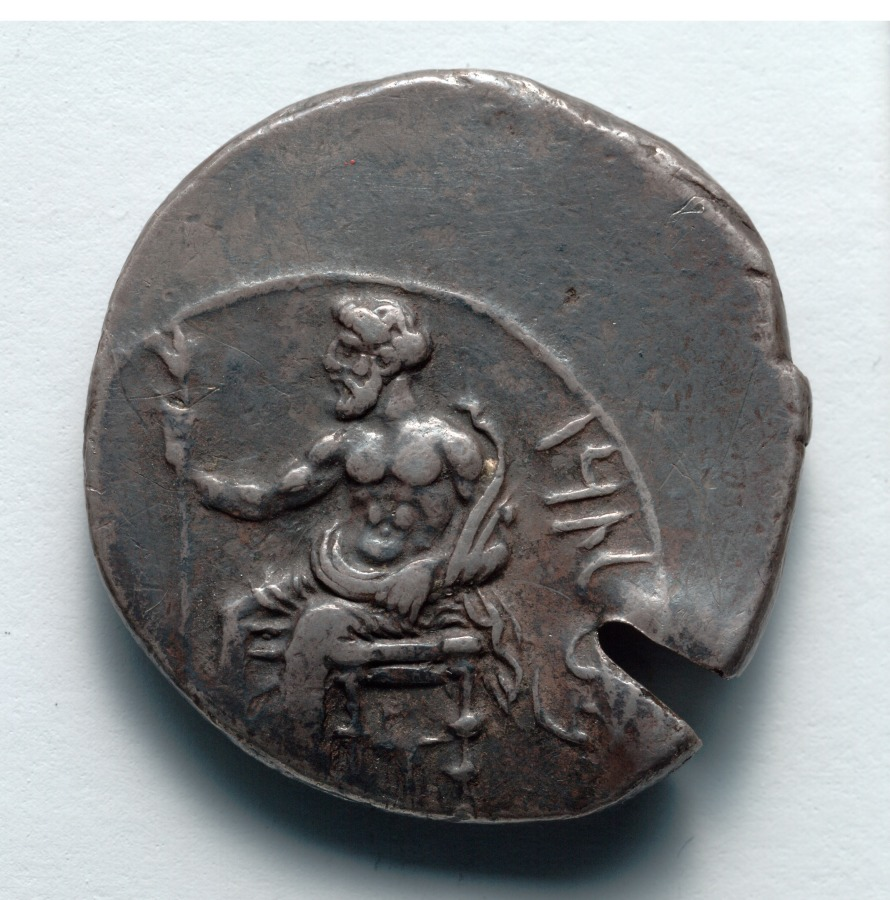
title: Stater: Baal (obverse); Head of Pharnabazos (reverse)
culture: Iran, Achaemenid (550–330 BCE), minted at Tarsos (Kilikia)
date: 379–374 BCE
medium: silver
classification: Coins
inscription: 𐡐𐡓𐡍𐡁𐡆𐡅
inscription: 𐡊𐡋𐡊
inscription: 𐡁𐡏𐡋]𐡕𐡓𐡆]